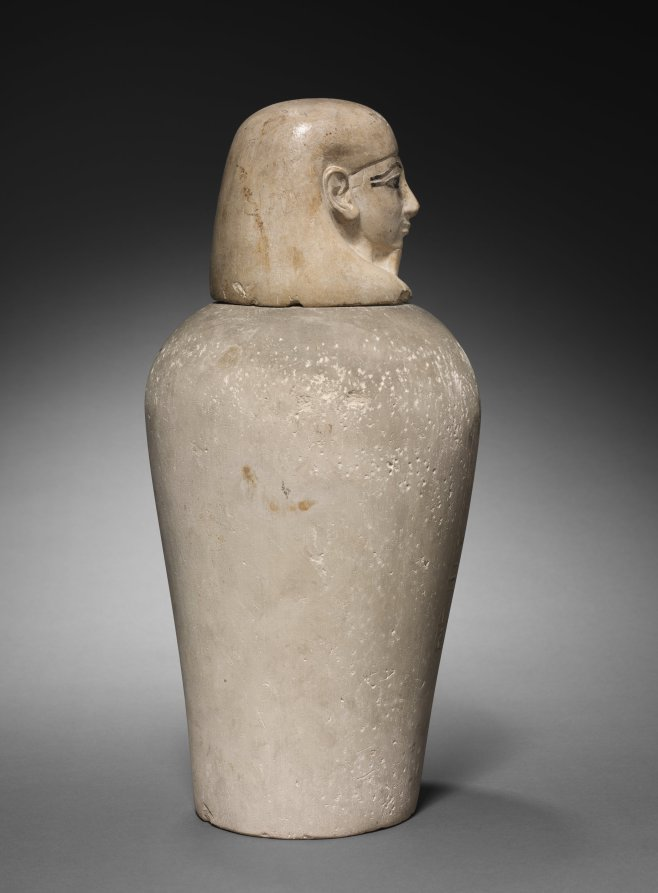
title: Canopic Jar with Lid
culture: Egypt, New Kingdom (1540–1069 BCE), Dynasty 18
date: 1540–1296 BCE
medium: limestone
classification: Funerary Equipment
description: Embellished tulle strips delicately wrap around the length of the Dior gown like linen covering a mummified body. As European artists in the 1800s who journeyed to Egypt drew what they saw, for the Dior collection he designed, John Galliano sketched his experiences in Egypt to develop this theatrical collection, merging additional inspirations of medical bandages and fetish fashion. In ancient Egypt, mummification was the most sacred practice performed. Rituals, such as removing organs and placing them in canopic jars, like the one here, and wrapping bodies and putting them in coffins, helped ensure the deceased’s safe passage into the afterlife.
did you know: Canopic jars are named after the Greek sailor Canopus, who was said to be buried at Canopus (Abuqir) in the western Nile delta and worshipped there in the form of a human-headed jar that was actually a form of Osiris and had nothing to do with internal organs. But the term has stuck.